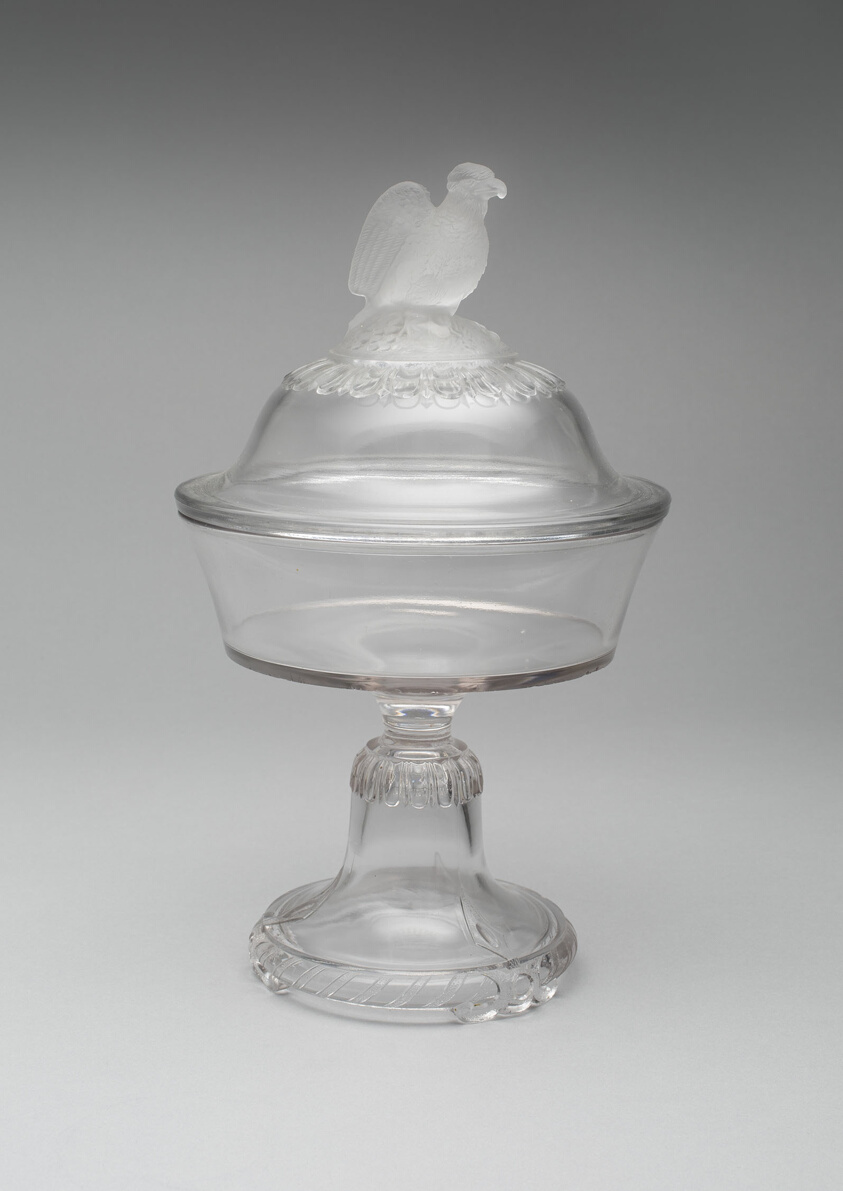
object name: Glass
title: "Old Abe/Frosted Eagle" pattern medium covered compote on pedestal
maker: Attributed to Crystal Glass Company; Bridgeport, Ohio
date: 1880–90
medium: Glass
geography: Ohio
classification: compote; glass; vessel for serving food; american decorative arts; american arts; decorative arts